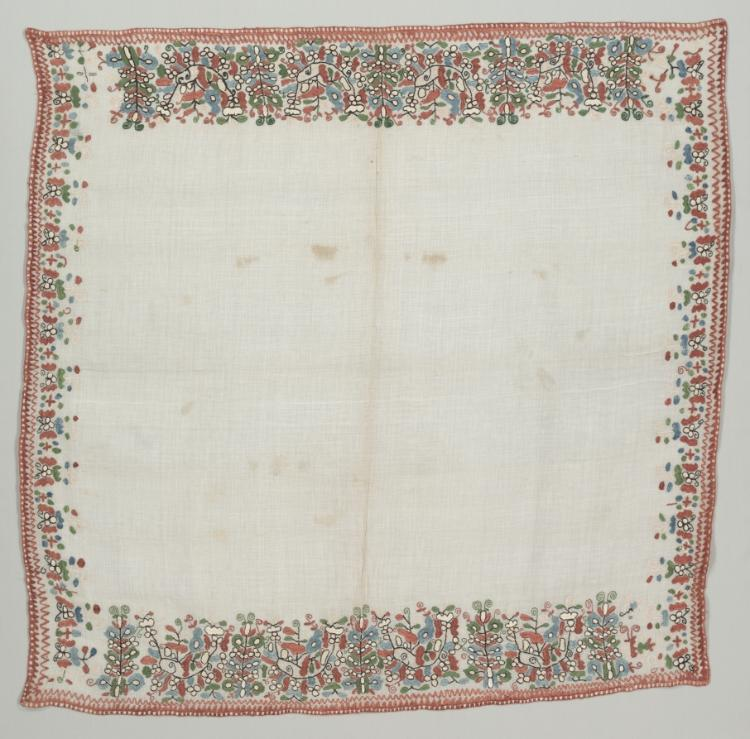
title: Headcloth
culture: Albania, 19th century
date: 1800's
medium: linen, embroidered with silk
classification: Garment